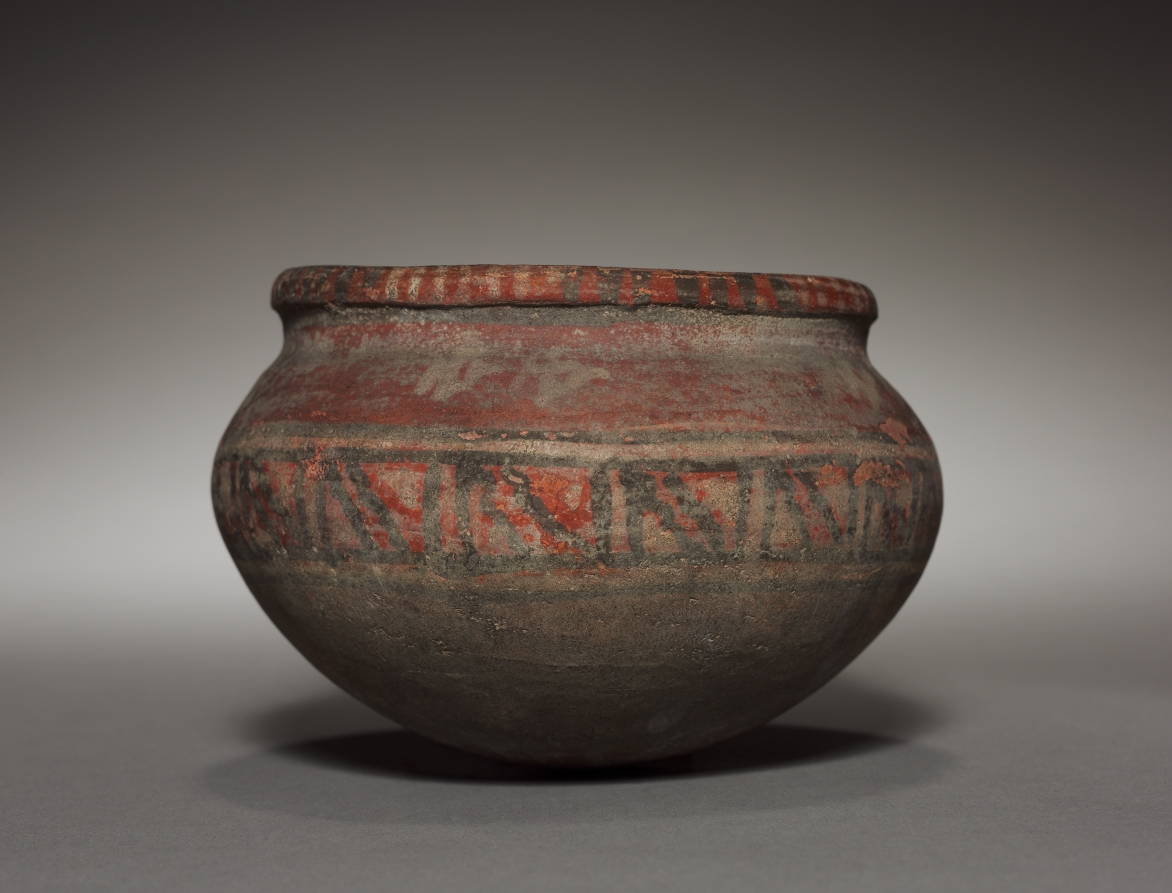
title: Bowl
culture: Peru, South Coast, 10th-11th century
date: 900–1100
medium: pottery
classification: Ceramic